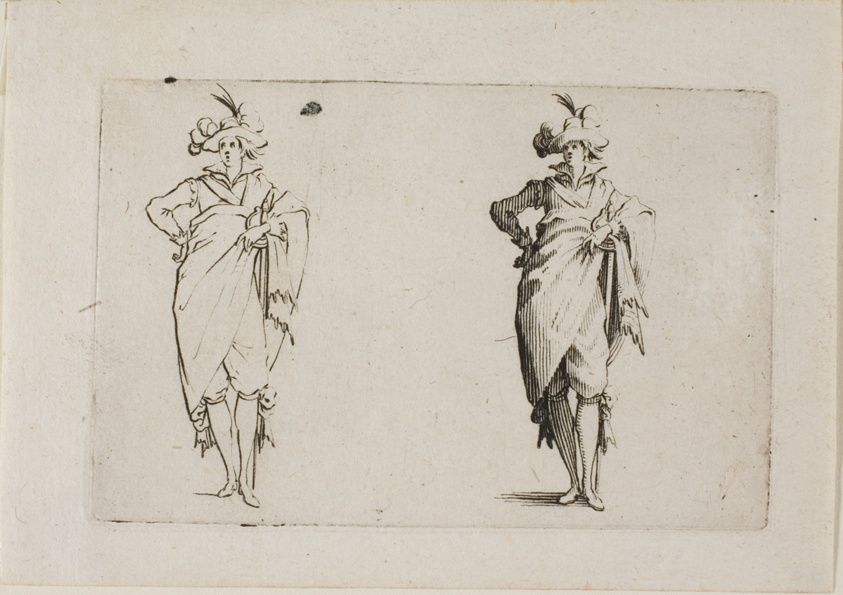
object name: Print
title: The Gentleman Seen from the Front, with his Right Hand on his Hip, from The Caprices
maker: Jacques Callot (French, 1592-1635)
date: c. 1622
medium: Etching on ivory laid paper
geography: France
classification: etching; print; prints and drawing